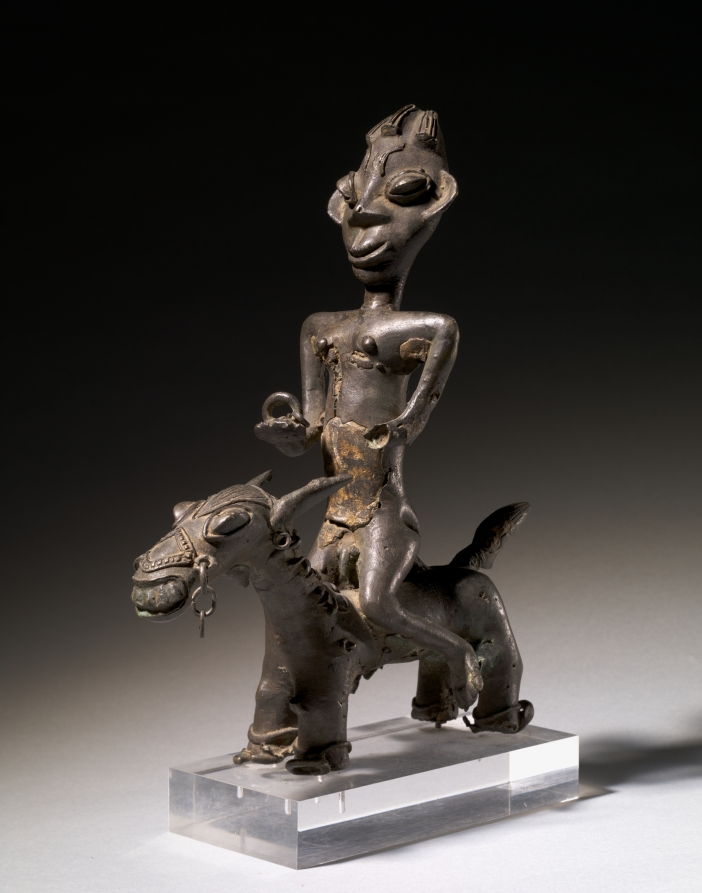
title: Altar figure (onílé)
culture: Africa, West Africa, Nigeria, Yorùbá-style maker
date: possibly 1700s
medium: Copper alloy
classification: Sculpture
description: This figure of a horse and rider is related to the Ògbóni society, whose responsibilities include the burial of titleholders and leaders and the judgment and punishment of criminals. A counterweight to the authority of the king, it is also responsible for the selection, installation, and removal of rulers. Probably once forming a pair with a female figure, the equestrian symbolized the king’s male ancestors.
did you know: Images of horses and riders cast in copper alloy are rare among Yoruba sculptures.